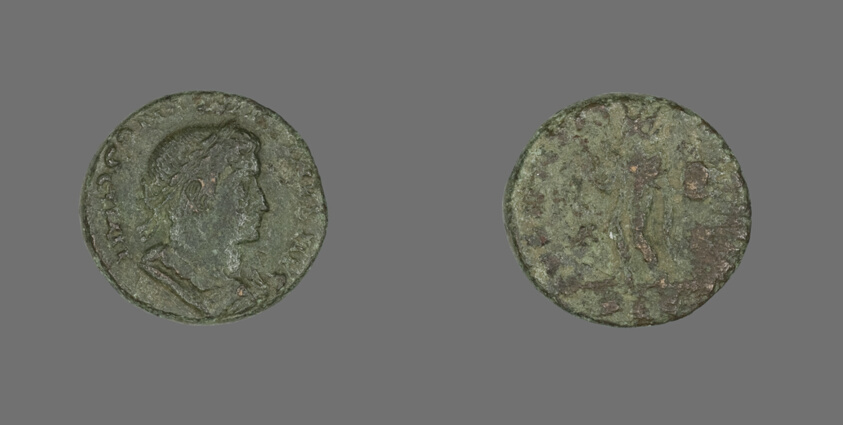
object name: Coin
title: Coin Portraying Emperor Emperor Constantine I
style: roman (ancient, style or period), ancient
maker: Roman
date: 307-337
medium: Bronze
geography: Roman Empire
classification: coin; ancient art